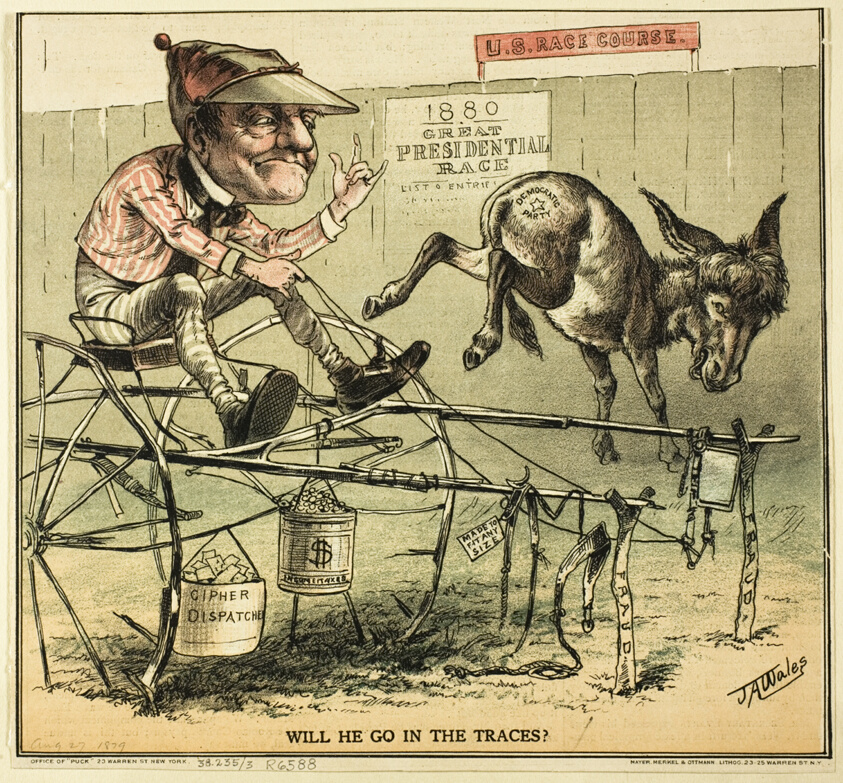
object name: Print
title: Will He Go in The Traces, from Puck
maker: James A. Wales (American, 1852-1886)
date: published August 27, 1879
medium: Color lithograph on newsprint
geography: United States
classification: lithograph; print; prints and drawing